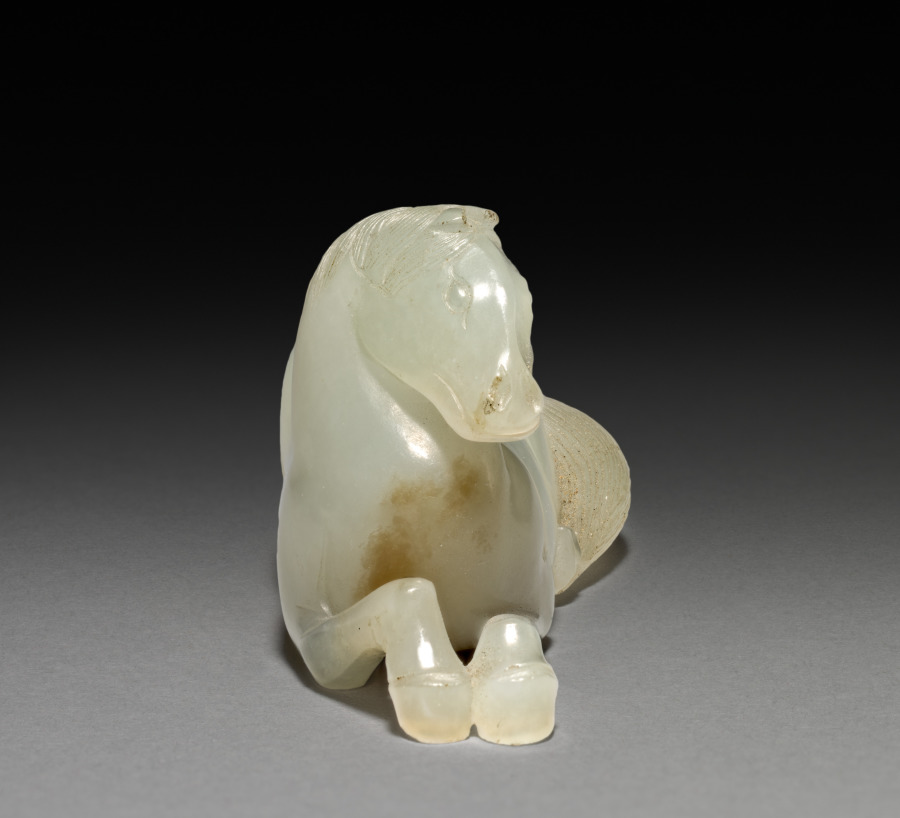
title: Horse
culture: China, Qing dynasty (1644-1911)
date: 1600s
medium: jade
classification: Jade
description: In China, access to political power was granted to those who passed the civil service examinations, a system that offered official service only at a high level of education. Chinese literati-officials whose daily routine was administrative work in an office, enjoyed precious objects on their writing desks that offered distraction and demonstrated good taste. By the Ming (1368–1644) and Qing (1644–1911) dynasties, these utensils of the literati studio became also collectibles and were treasured as artworks. Desk objects included paper weights; seals and seal paste boxes; brush rests, wrist rests and brush holders; water droppers, ink cakes, miniature mountains, and albums, all ranging in material from jade, gilt bronze, lacquer, and wood to porcelain.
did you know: The white jade surface of the horse has been brightly polished, but portions of the original stone's "skin" remain on the base and below the head.